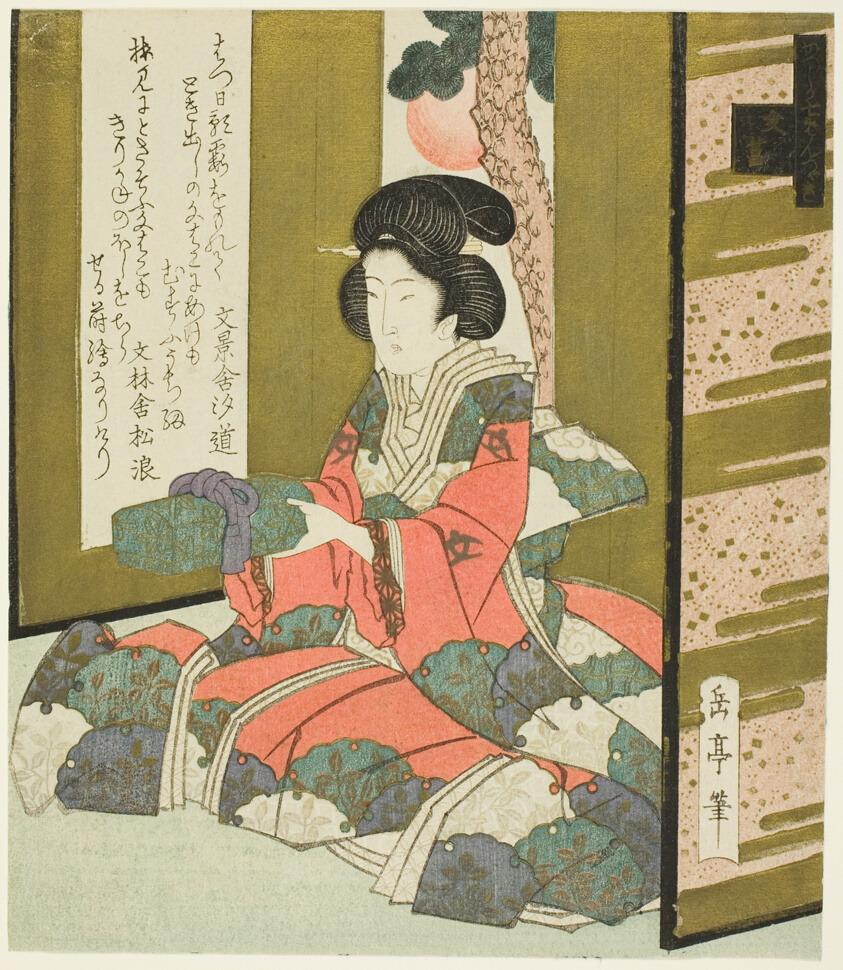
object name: Print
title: A Woman Holding a Letter Box, from the series "A Set of Seven for the Katsushika Club"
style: Japanese (culture or style)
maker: Yashima Gakutei (Japanese, 1786 (?)-1868)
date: c. 1825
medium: Color woodblock print with metallic pigments, surimono shikishiban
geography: Japan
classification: woodblock print; print; asian art